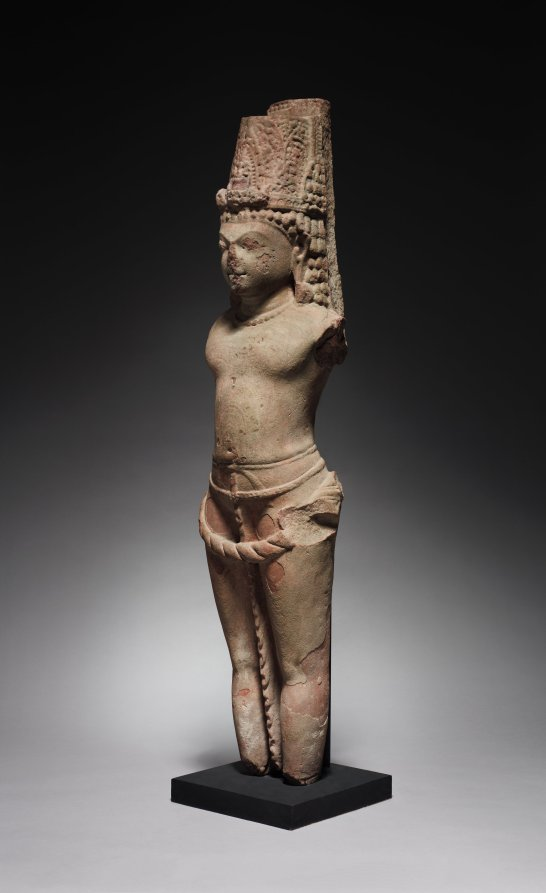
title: Standing Vishnu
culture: Northern India, Mathura, late Gupta Period (320-647)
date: late 500s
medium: red sandstone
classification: Sculpture